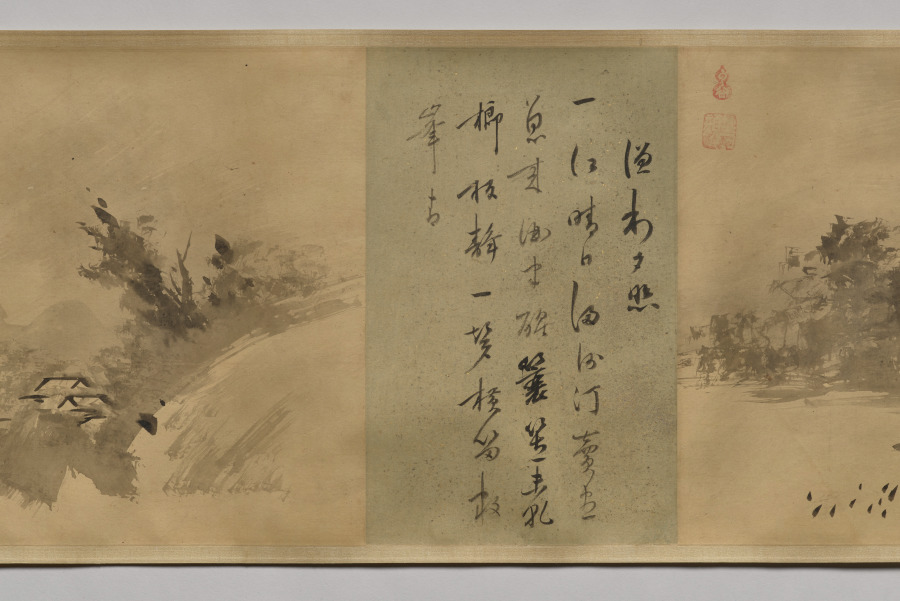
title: Poems and Pictures of the Eight Views of Xiao-Xiang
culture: Japan, Momoyama period (1573–1615)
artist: Unkoku Tōgan (Japanese, 1547–1618)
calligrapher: Inkei Gentetsu (Japanese, 1562–1612)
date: 1605–12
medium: Handscroll; ink on paper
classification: Painting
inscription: Each painting sealed with red gourd-shaped seal reading Unkoku (雲谷) and a square seal reading Tōgan (等顔).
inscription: Each painting prefaced with a titled poem on the Eight Views of Xiao-Xiang by Yujian Ruofen (active late 13th century) inscribed by Japanese Buddhist monk Inkei Gentetsu (1562–1612).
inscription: 右寫玉㵎之筆勢／雪舟末葉等顔筆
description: Unkoku Tōgan brushed these scenes using the splashed-ink technique associated in Japan with the Chinese monk Yujian Ruofen (active late 1200s). Xiao-Xiang refers to the region in present-day Hunan province, where the Xiang River and its tributaries converge. Each of the eight views evokes a time of day or season. The earliest surviving series of Xiao-Xiang paintings is by Wang Hong (active mid-1100s), but textual evidence tells us the theme appears earlier. It was later adopted in Japan and Korea, as seen here. The poems were inscribed by Inkei Gentetsu, the third abbot of the Rinzai Zen temple Tōshunji, Japan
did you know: The “Tō” of Tōgan comes from the name of painter Sesshū Tōyō (1420–1506).